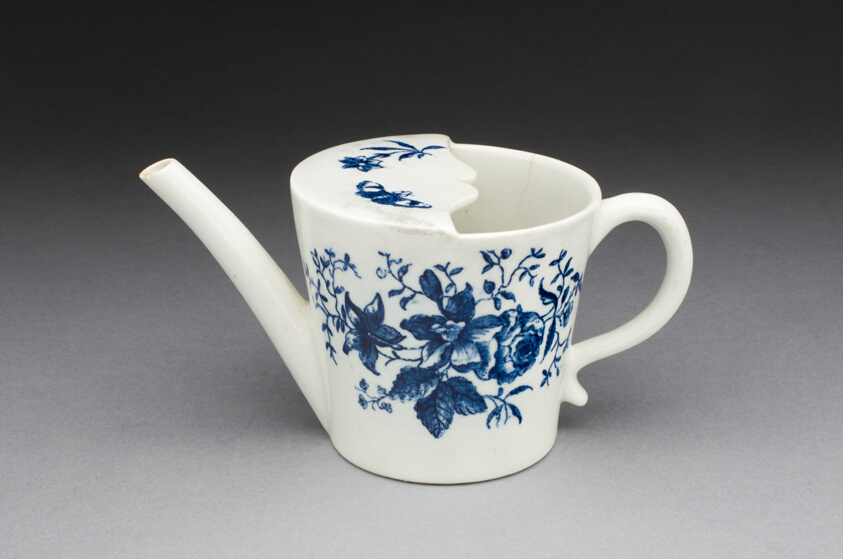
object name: Ceramics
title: Feeding Mug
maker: Lowestoft Porcelain Factory (English, 1757-1802)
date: c. 1780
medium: Soft-paste porcelain with blue transfer-printed decoration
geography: Lowestoft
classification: tableware; porcelain; european decorative arts; ceramics